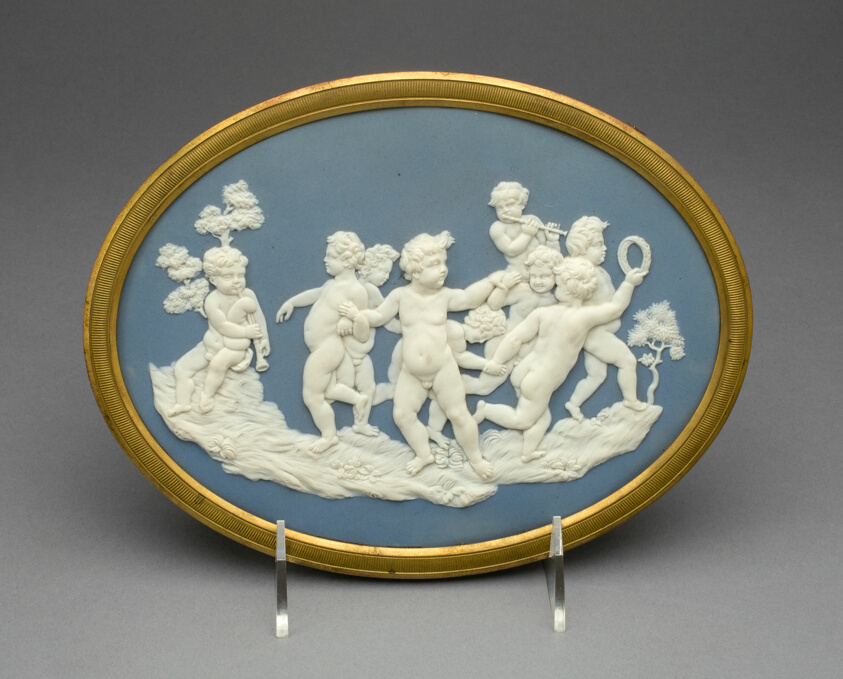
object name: Ceramics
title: Plaque with Boys Playing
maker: Wedgwood Manufactory (England, founded 1759)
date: 1769/80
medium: Stoneware (jasperware)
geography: Burslem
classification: sculpture; stoneware; european decorative arts; ceramics